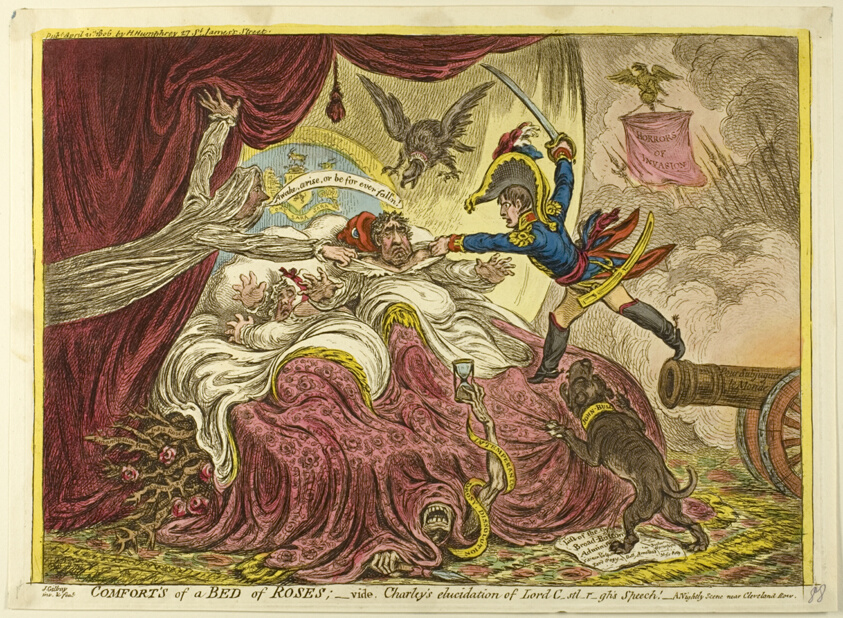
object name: Print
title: Comforts of a Bed of Roses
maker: James Gillray (English, 1756-1815); published by Hannah Humphrey (English, c. 1745-1818)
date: published April 21, 1806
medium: Hand-colored etching and aquatint on paper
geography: England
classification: etching; print; prints and drawing